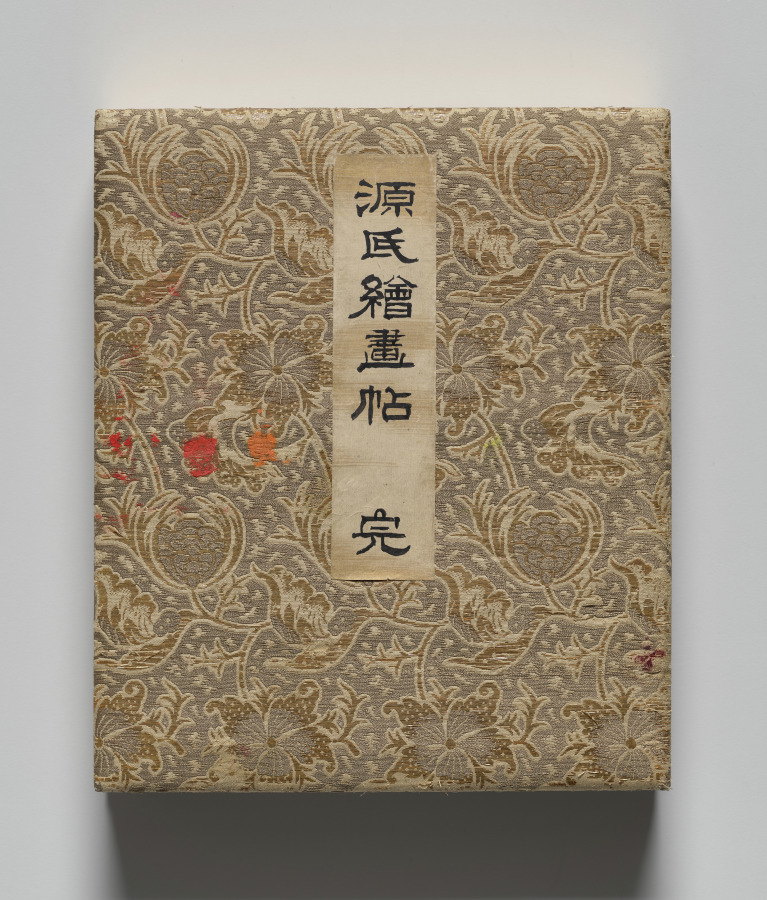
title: Album of Illustrations for the Tale of Genji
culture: Japan, Edo period (1615–1868)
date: 1600s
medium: Double-sided accordion-style album of 17 leaves; ink, light color, and gold on paper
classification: Bound Volume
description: This album contains illustrations for the classic literary work the Tale of Genji, authored in the 1000s by Murasaki Shikibu, an aristocrat of the Heian period (794–1185) court. The scenes are painted in the “white drawing” (hakubyō) mode, in which a fine ink line is used to depict figures and spaces with great subtlety, punctuated only occasionally by traces of red pigment for a character’s lips, a detail of a garment, or a decorative element. These two scenes illustrate episodes from the chapters “Thin Veil of Cloud” (Usugumo) and “Barrier Gate” (Sekiya).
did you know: The illustrations are identified by chapter title in cartouches to the upper right of the paintings.